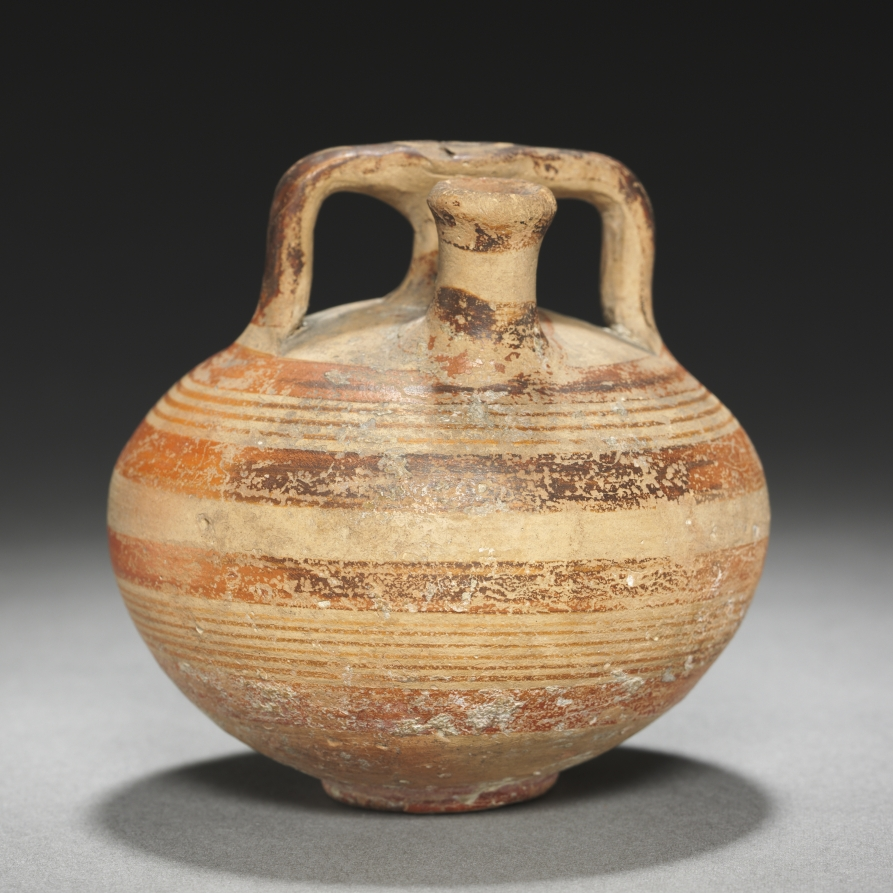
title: Miniature Stirrup Jar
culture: Cyprus, late Helladic III A2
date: c. 1350–1300 BCE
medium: Cypro-Mycenaean ware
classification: Ceramic